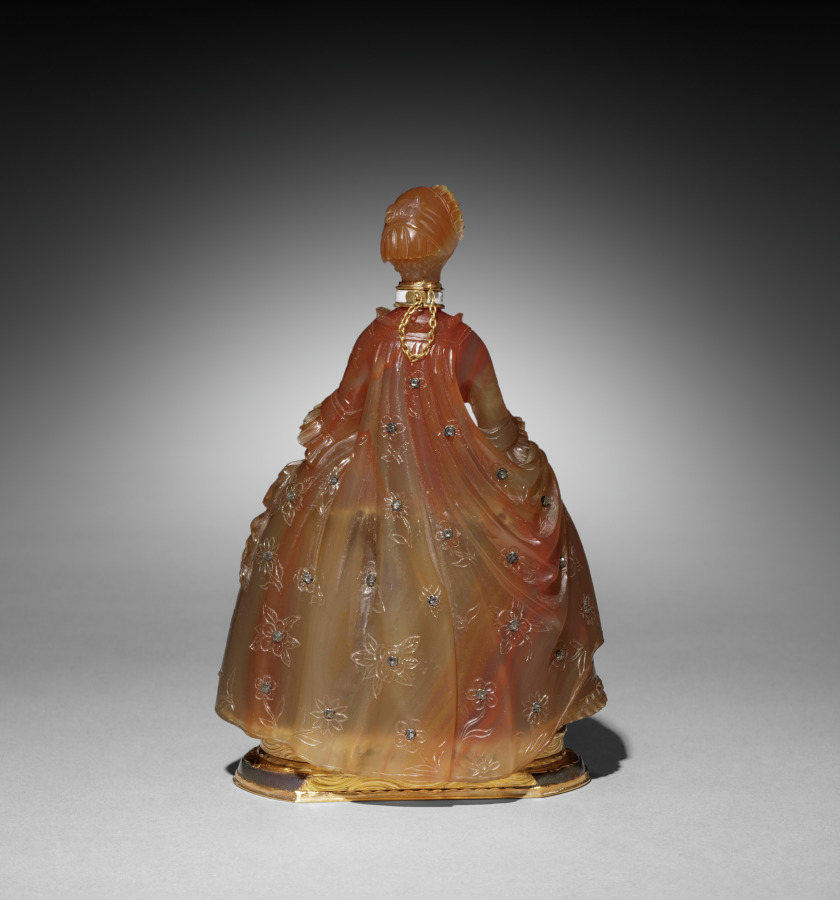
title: Scent Bottle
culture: England, 18th century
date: c. 1770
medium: chalcedony mounted in gold decorated with diamonds and enamel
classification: Miscellaneous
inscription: on neck collar: Gage d'amitie.